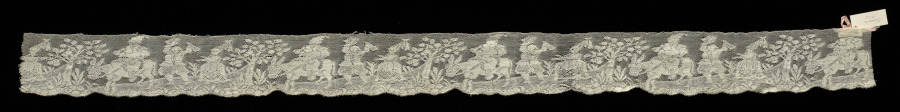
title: Lace Edging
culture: England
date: 1800–1840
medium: Machine-made lace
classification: Lace